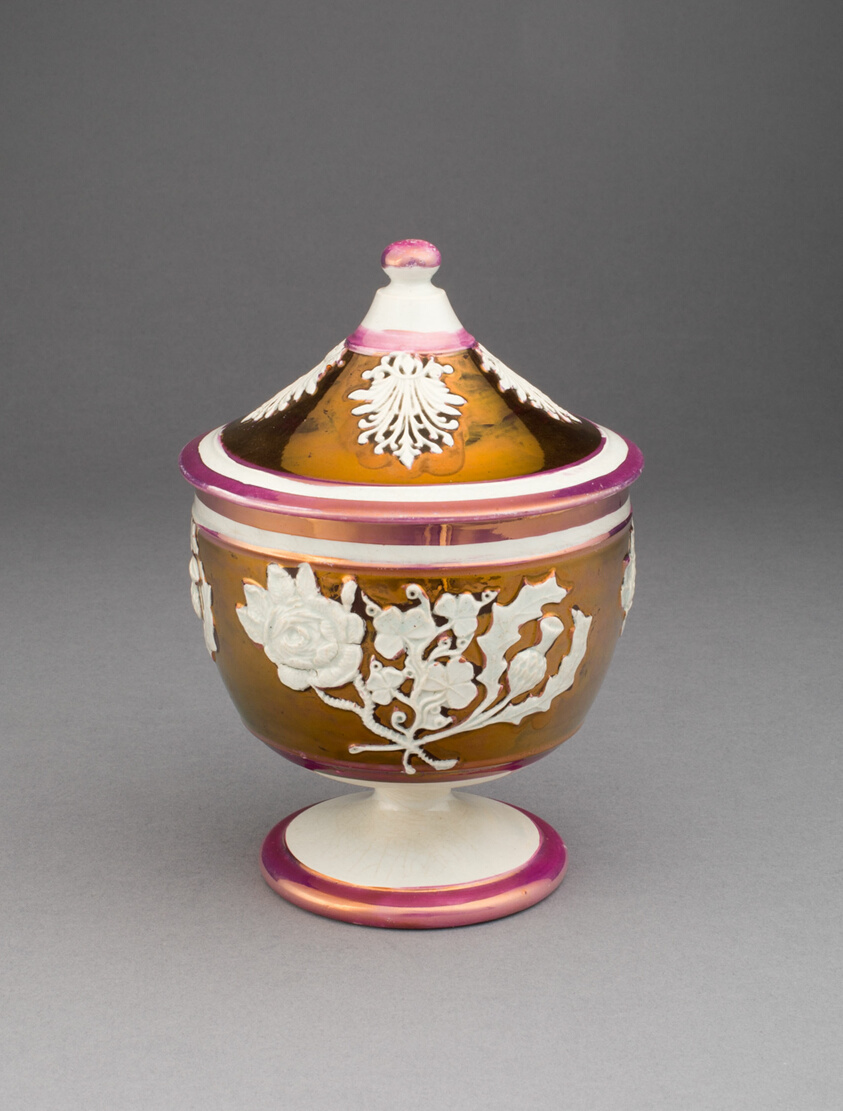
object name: Ceramics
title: Sugar Bowl with Symbols of England, Ireland, and Scotland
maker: England, Staffordshire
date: c. 1830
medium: Earthenware with copper lustre decoration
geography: Staffordshire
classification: sugar bowl; teaware; ceramics; european decorative arts; earthenware